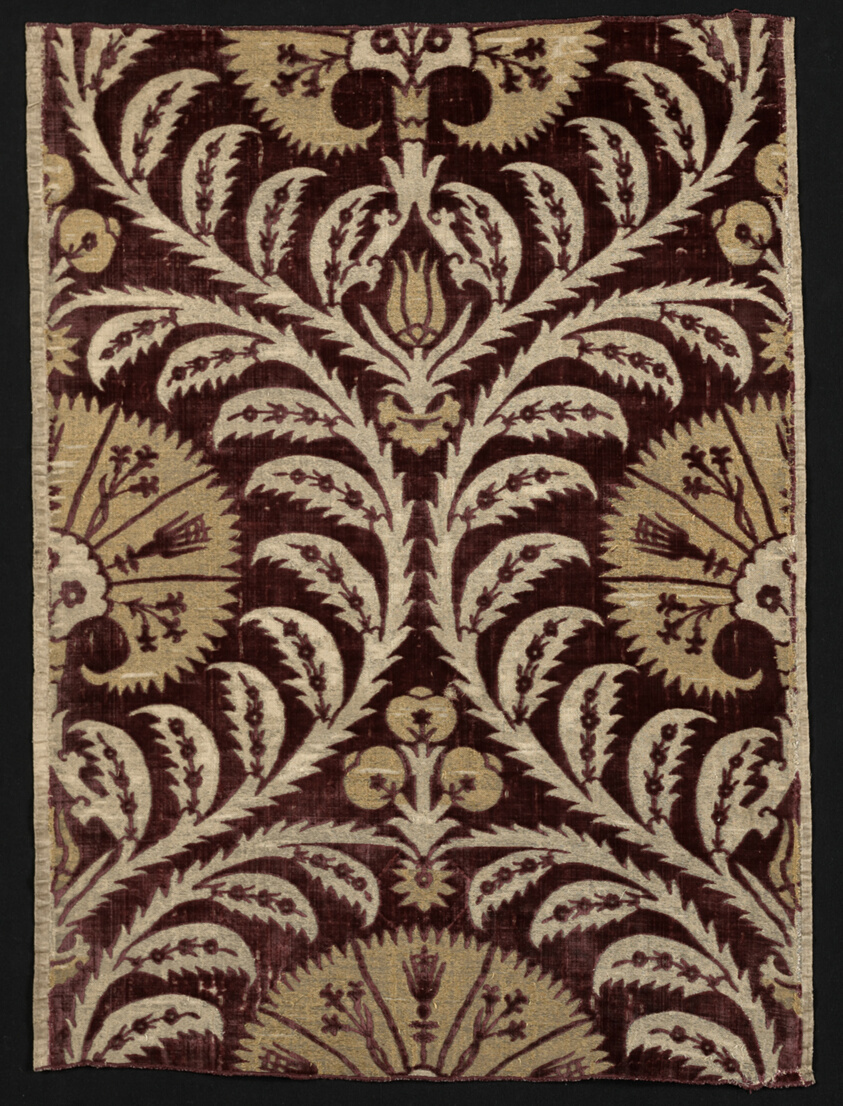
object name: Textile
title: Panel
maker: Turkey, Bursa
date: 1575/1600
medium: Silk; “gold” and “silver” metal-wrapped silk, satin weave with “gold” and “silver” supplementary metal-wrapped silk brocading wefts, supplementary binding wefts, and supplementary warps forming cut and voided velvet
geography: Turkey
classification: textile; weaving - velvet